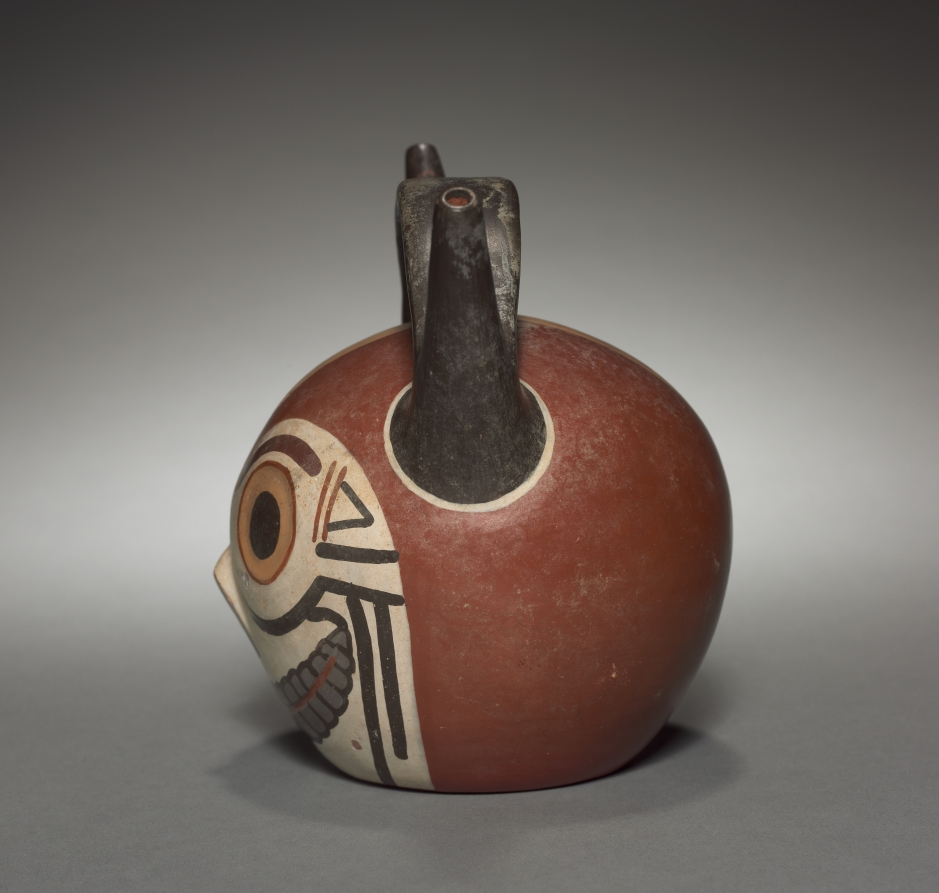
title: Skull Vessel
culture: Wari (Pachacamac) style, Middle Horizon, Epoch 2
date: 500–900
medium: earthenware with colored slips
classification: Ceramic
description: This vessel's clear, vibrant color reveals the inspiration of Wari ceramics in those of the South Coast Nasca. The twin spouts joined by a flat, handle-like bridge are also an old South Coast spout type.